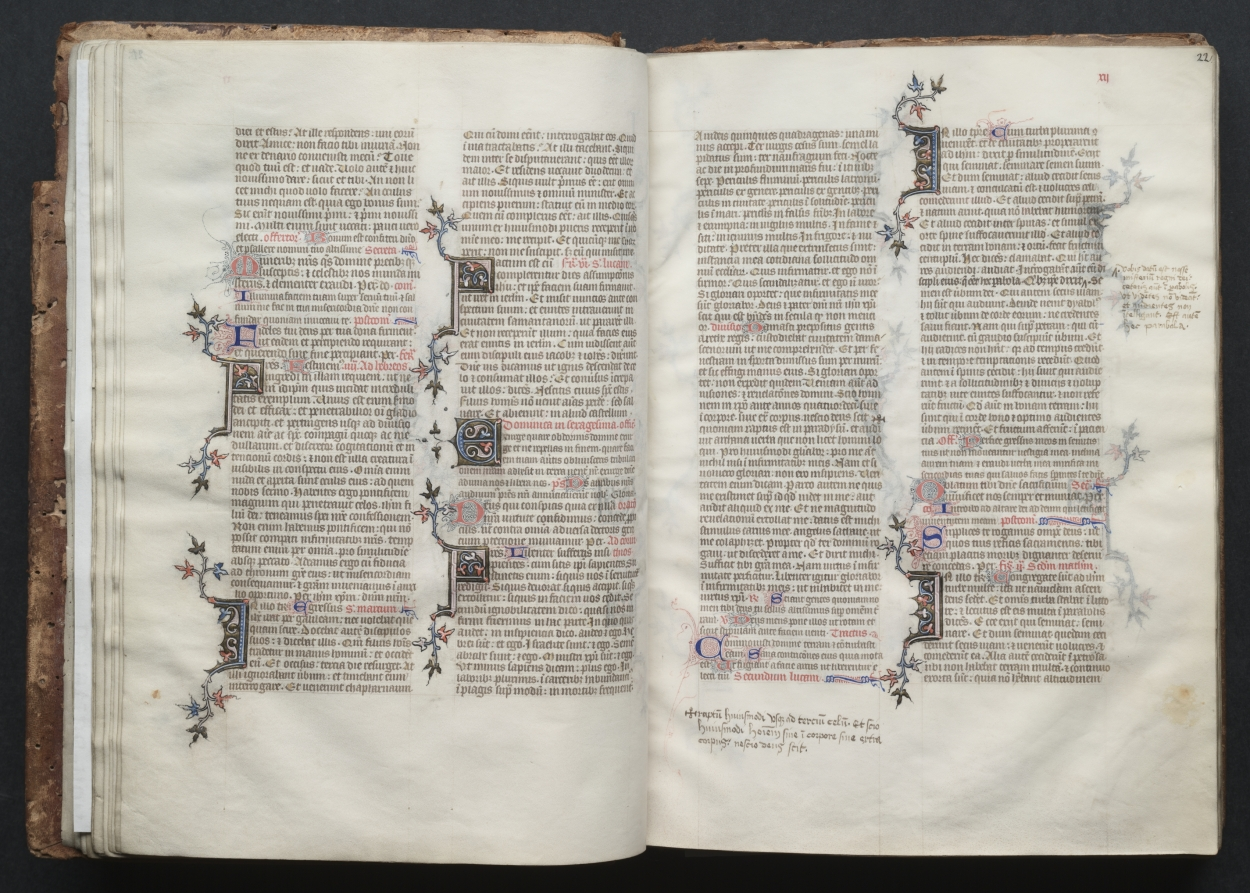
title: The Gotha Missal: Fol. 22r, Text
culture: France, Paris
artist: Master of the Boqueteaux (French)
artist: and Workshop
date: c. 1375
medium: ink, tempera, and gold on vellum; blind-tooled leather binding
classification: Bound Volume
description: The style and quality of this manuscript's decoration is typical of deluxe Parisian books made for aristocratic or royal patrons. Most of the book's decoration appears to be the work of the Master of the Boqueteaux, an artist active at the court of King Charles V (died 1380). His style was apparently shared by a number of book illuminators working in and around Paris. It is very possible that the Gotha Missal belonged to Charles V, but is not provable because the manuscript has no royal portraits and lacks a colophon. Given the book's magnificent decoration, however, it would seem that it was produced for a Valois prince, if not for the king himself. The manuscript receives its name from the German dukes of Gotha, its later owners.